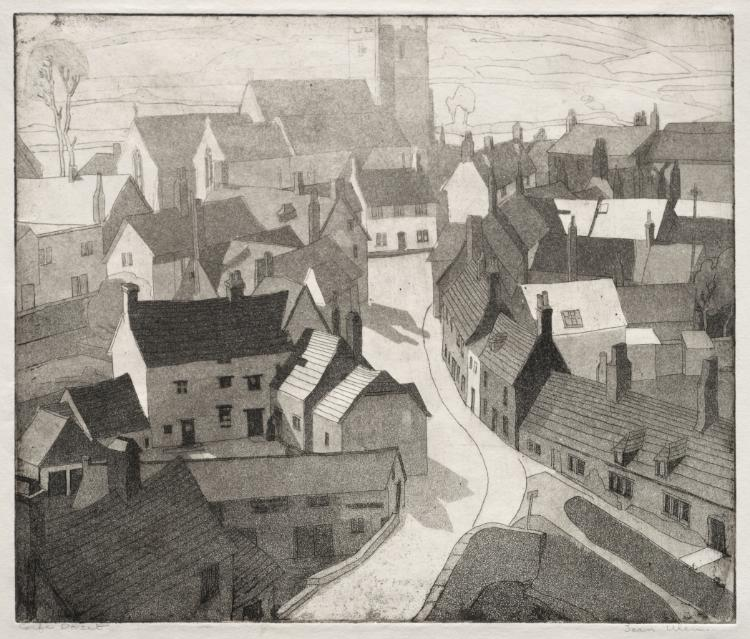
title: Corfe, Dorset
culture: America, Ohio, Cleveland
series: 2944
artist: Jean Ulen (American, 1900–1988)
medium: etching and aquatint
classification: Print